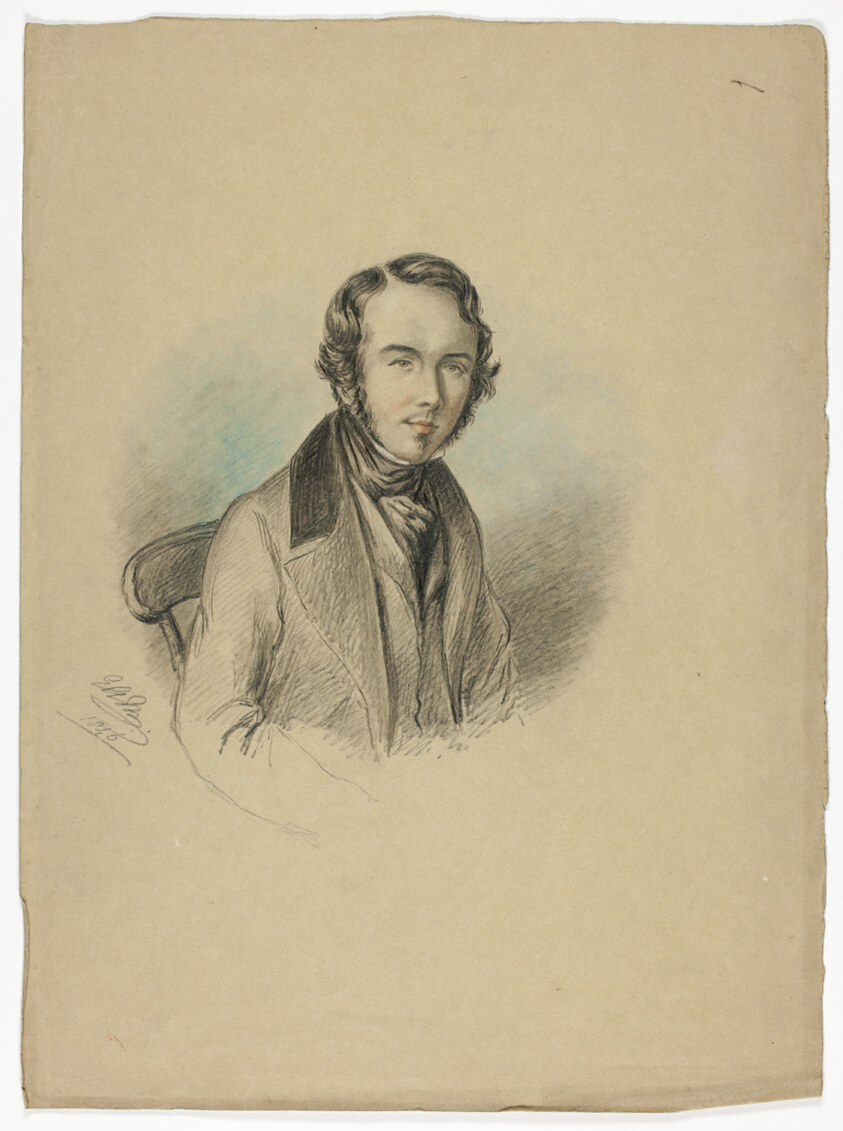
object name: Drawing and Watercolor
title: Portrait of a Man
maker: Elizabeth Murray (English, c. 1815-1882)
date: 1846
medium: Graphite with colored pencil and traces of white gouache on brown wove paper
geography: England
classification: colored pencil; drawings (visual works); prints and drawing